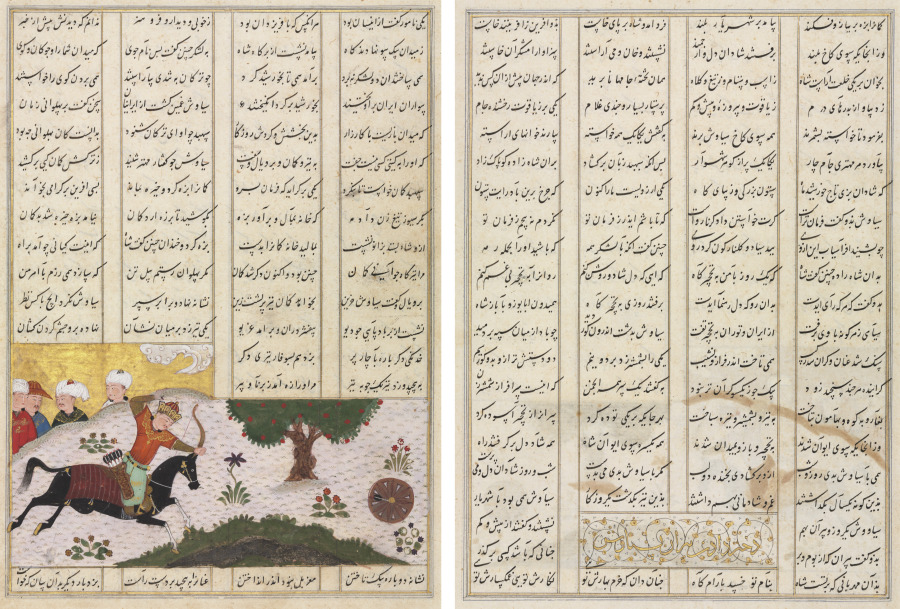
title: Siyavush on His Horse Hitting a Rolling Target (recto) and Persian verses (verso), from a Shahnama (Book of Kings) of Firdausi (940–1019 or 1025)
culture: Iran, Shiraz, Timurid period (1370-1501)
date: late 1400s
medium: Opaque watercolor, silver, gold, and ink on paper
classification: Manuscript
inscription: script: Nasta'liq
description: A prince from Iran’s early legendary history, Siyavush was sent by his father, the shah, to train under the great warrior Rustam in the arts of hunting, archery, and horseback riding. In this painting, Siyavush demonstrates his considerable skill by hitting the bulls eye on a rolling target from horseback. The gold sky, pastel ground with grassy tufts, and dense leafy riverbank are distinctive features of Persian painting during this period.